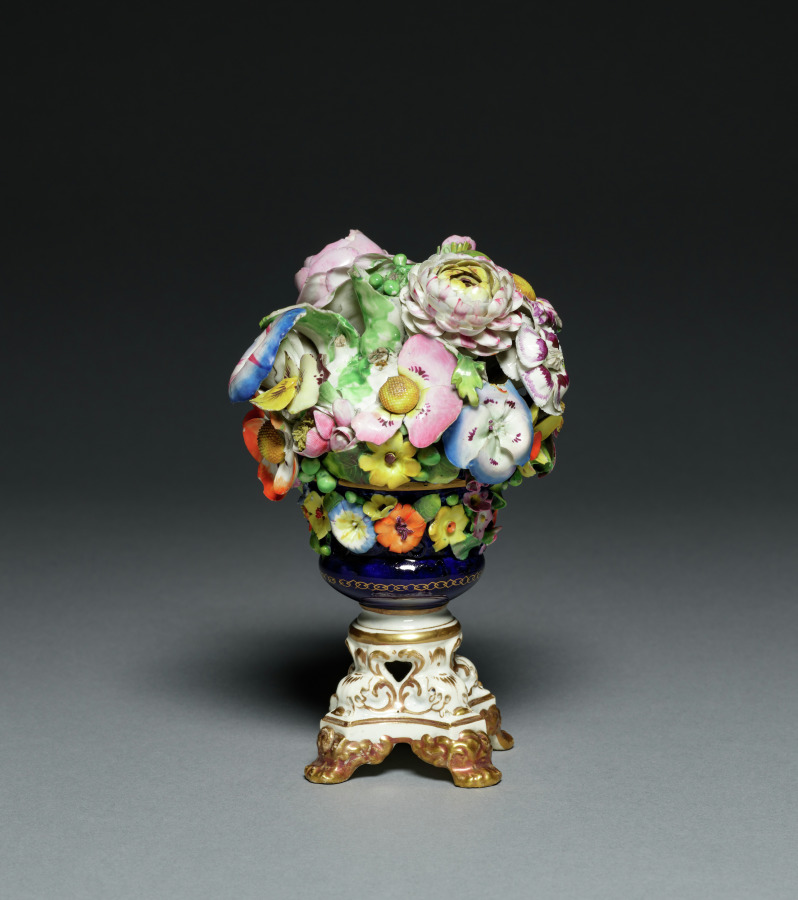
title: Flower Pot and Flowers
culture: England, Derby, 19th century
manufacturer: Derby Porcelain Factory (Bloor Period) (British)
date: 1811–1848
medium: artificial porcelain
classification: Ceramic